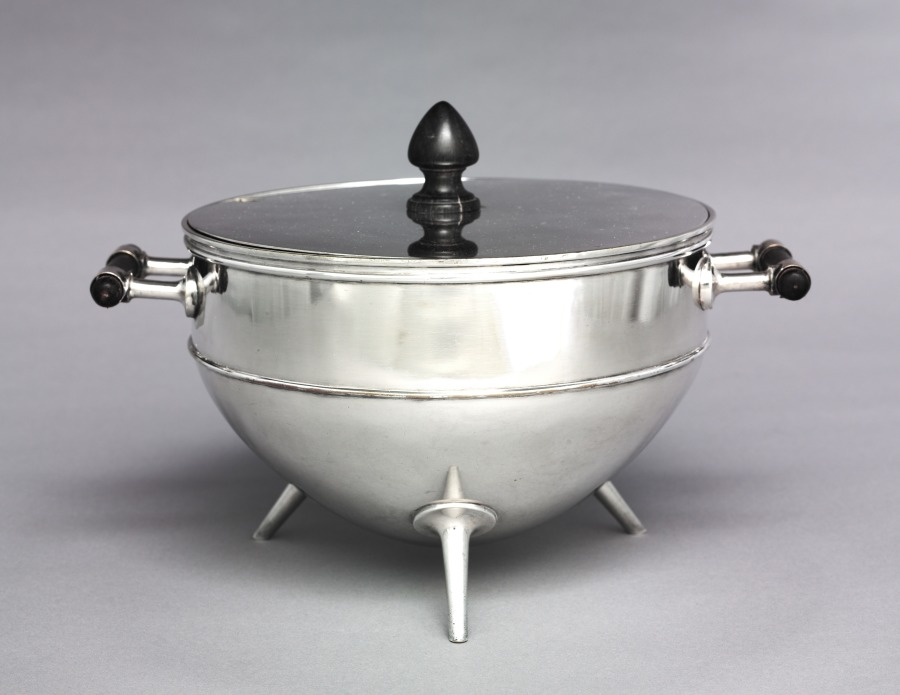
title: Covered Tureen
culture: England, 19th century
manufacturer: Hukin & Heath (British)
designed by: Christopher Dresser (British, 1834–1904)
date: c. 1880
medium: silver plated metal, ebony handles and knop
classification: Metalwork